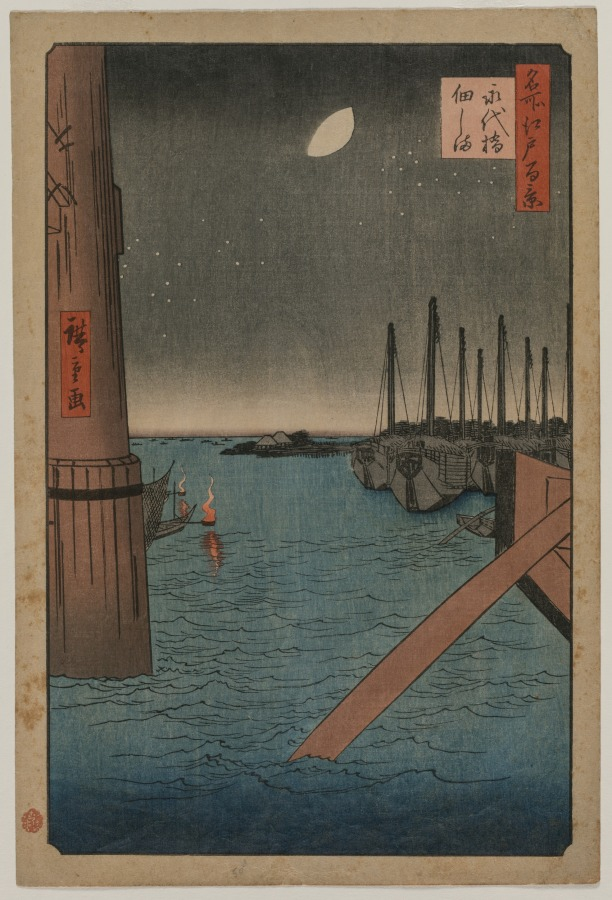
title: Tsukudajima from Eitai Bridge, from the series One Hundred Views of Famous Places in Edo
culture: Japan, Edo period (1615–1868)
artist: Utagawa Hiroshige (Japanese, 1797–1858)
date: 1858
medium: color woodblock print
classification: Print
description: This woodblock print is from the series of landscape views of Edo, present-day Tokyo, from Hiroshige’s late career. The series title is in the dark red rectangular cartouche on the upper right, while the name of the print is in the pink square. Although Tsukudajima and Eitai Bridge are important enough to merit mentions in the title, the island is tiny and in the distance at the mouth of the river, and only part of a bridge piling is visible. Hiroshige’s dramatic composition instead foregrounds the oar of a passing boat. Other vessels in the middle distance moored under the starry sky. Fishing boats with burning torches to attract fish ply the water both near the bridge and beyond the island.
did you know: Moonlight casts a glow on the masts and ships at anchor, and stars dust the evening sky.